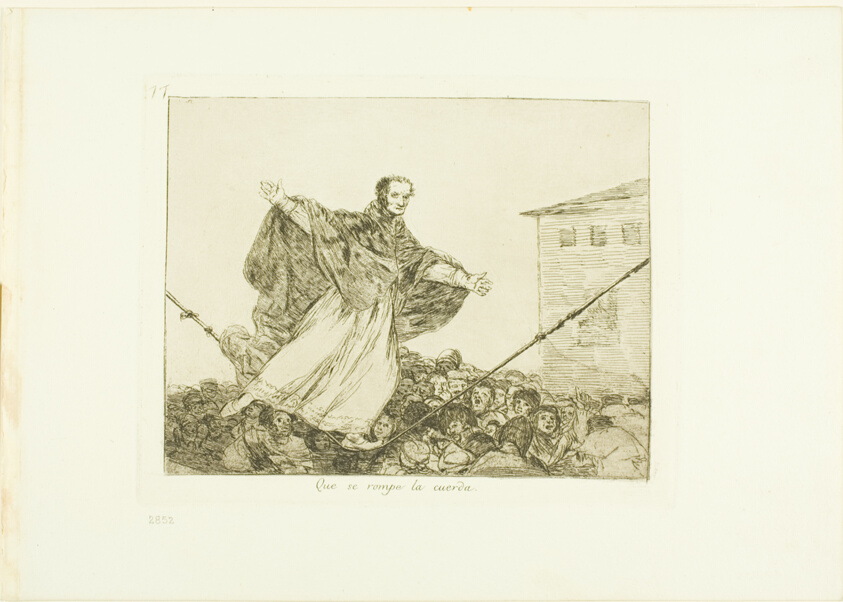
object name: Print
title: May the cord break, plate 77 from The Disasters of War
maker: Francisco José de Goya y Lucientes (Spanish, 1746-1828)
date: 1815/20, published 1863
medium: Etching, burnished aquatint or lavis, and drypoint on ivory wove paper with gilt edges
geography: Spain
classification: etching; print; prints and drawing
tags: war